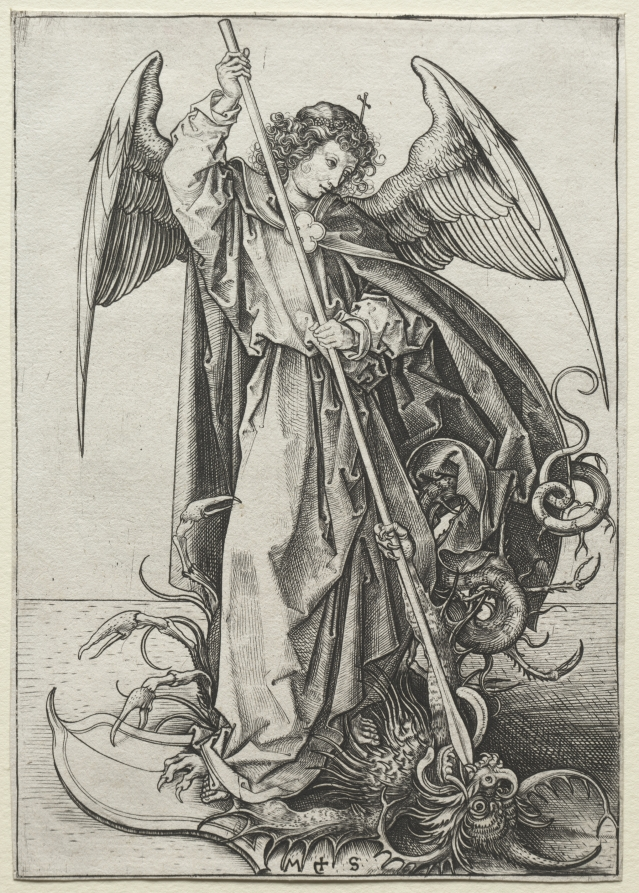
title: The Archangel Michael Piercing the Dragon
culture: Germany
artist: Martin Schongauer (German, c. 1450–1491)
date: c. 1475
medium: engraving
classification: Print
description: The Archangel Michael is the victorious defender and leader of God's armies, who battled against Satan the dragon and the rebellious angels to expel them from heaven (Revelation 12:7–9). From the narrative of this apocalyptic combat, Martin Schongauer isolates the figure of the Archangel Michael in the very moment he is finally overcoming Satan by trampling and piercing it with a long spear. He portrayed the dragon as a hybrid creature with horns, bird talons, crayfish claws, snake-like tail, and fur. Its ugliness and spiky forms contrast with the graceful feathery wings of the archangel, whose perfectly curled hair is set with a cruciform diadem adorned with pearls. Schongauer isolated the subject against a blank background, using a system of hatching to render complex drapery folds. In late medieval devotion, images of the Archangel Michael vanquishing the dragon were believed to be a protective tool that warded off evil.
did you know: The dragon of this print resembles monsters in another engraving by Martin Schongauer, The Temptation of Saint Anthony (1923.227).